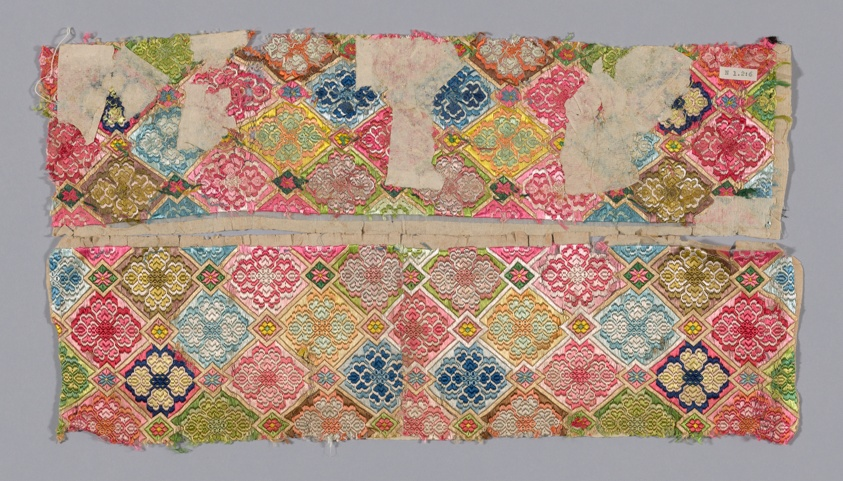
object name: Costume and Accessories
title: Band (from Woman's Trousers or Robe)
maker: China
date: 1875/1900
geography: China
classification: textile; needlework - costume; needlework (visual works); costume